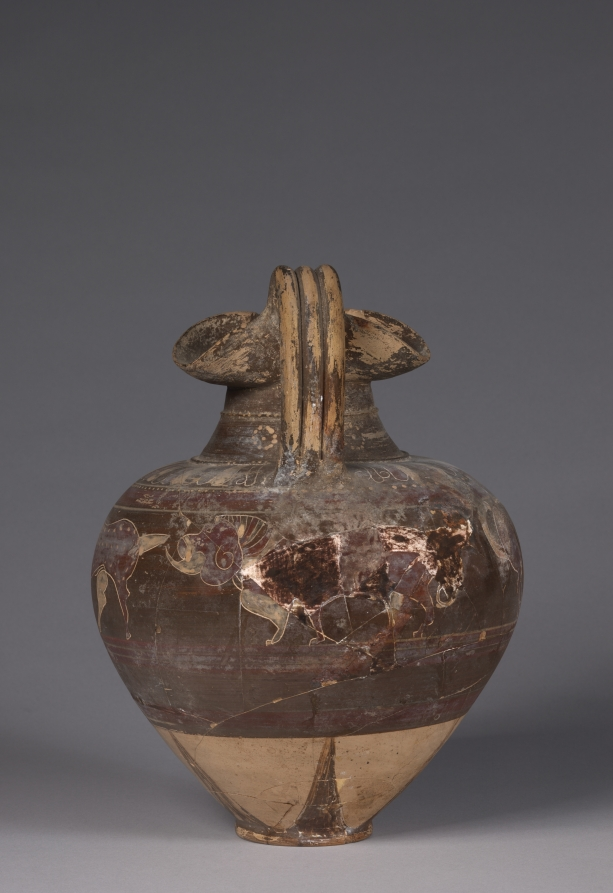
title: Polychrome Oinochoe (Wine Jug): Deer and Lions (?)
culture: Etruscan (Etrusco-Corinthian), probably made at Vulci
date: c. 600–575 BCE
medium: ceramic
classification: Ceramic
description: The animal frieze decorating the widest part of this round-bodied wine jug recalls black-figure pottery imported to Etruria from Greece (especially Corinth). The shape itself, with trefoil mouth and raised handle to facilitate pouring, also resembles Greek models, as do the simple tongues and rays above and below. But the polychromed animals—brightly painted with added white and reddish-purple—identify the vase as Etruscan, likely made at Vulci. The two deer seem to be grazing on stylized plants, unconcerned about the unusual animals pursuing them; these may be lions with horns and long tongues.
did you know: Four animals encircle this jug—two grazing deer and two predators, perhaps lions.